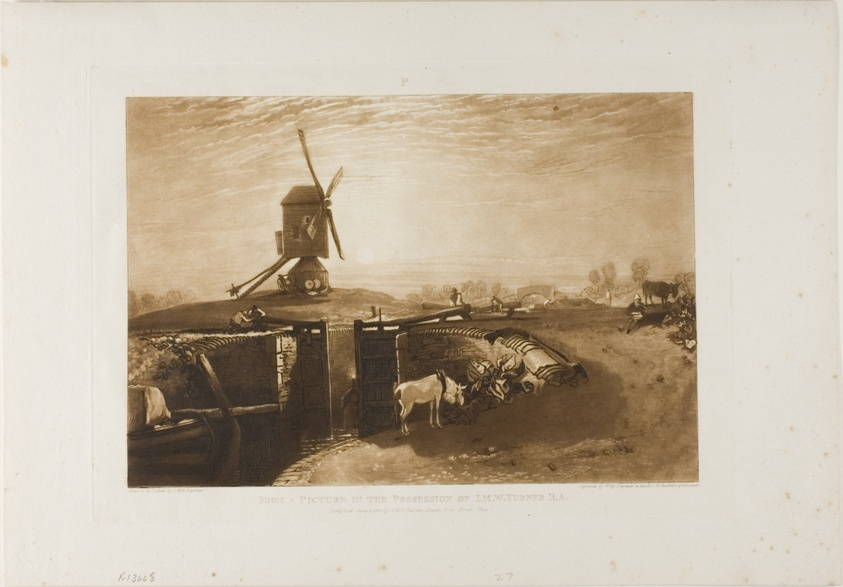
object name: Print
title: Windmill and Lock, plate 27 from Liber Studiorum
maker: Joseph Mallord William Turner (English, 1775-1851); Engraved by William Say (English, 1768-1834)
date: published June 1, 1811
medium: Etching and engraving in brown on ivory wove paper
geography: England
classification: etching; print; prints and drawing